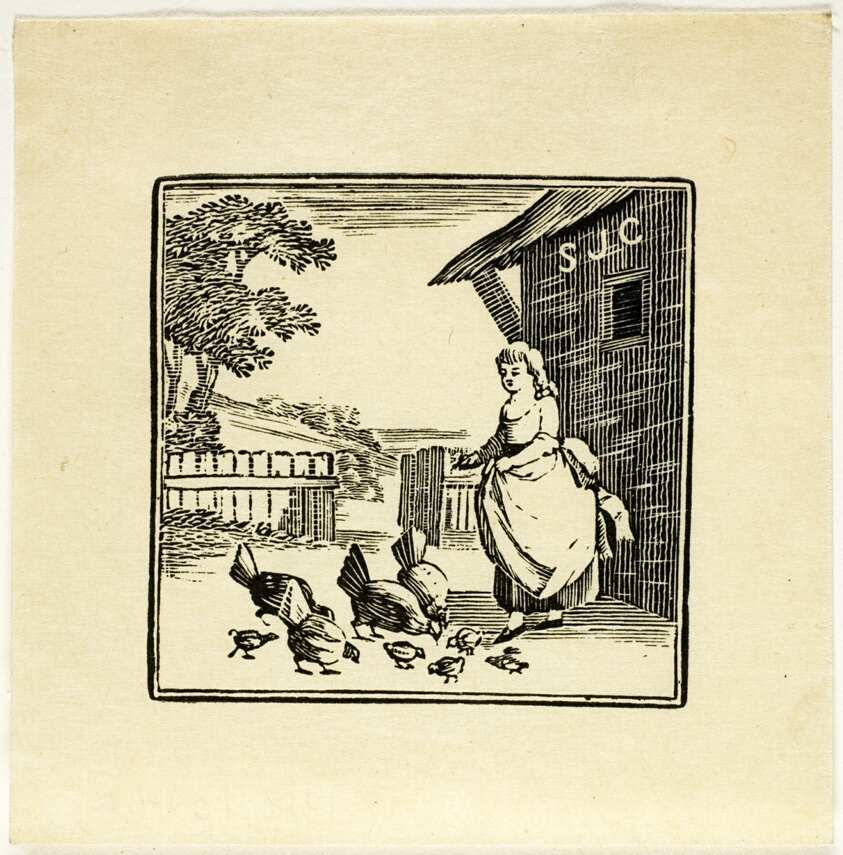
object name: Print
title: Book Illustration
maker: Thomas Bewick (English, 1753-1828)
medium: Wood engraving on paper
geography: England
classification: wood engraving; print; prints and drawing